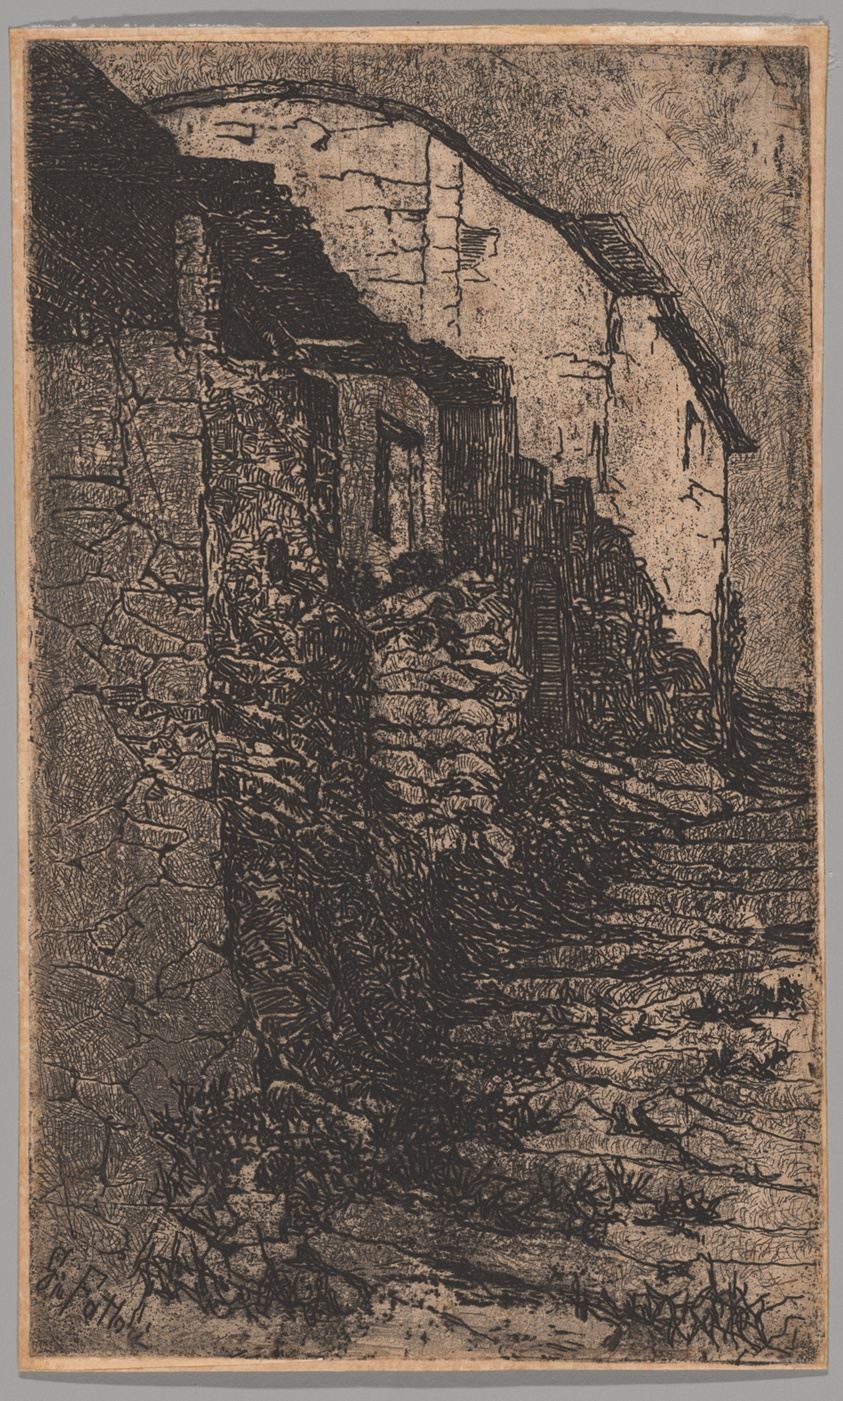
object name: Print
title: Bauco, Near Rome (Bauco presso Roma)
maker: Giovanni Fattori (Italiani, 1825-1908)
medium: Etching in black ink on cream wove paper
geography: Italy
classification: prints and drawing; etching; paper; print